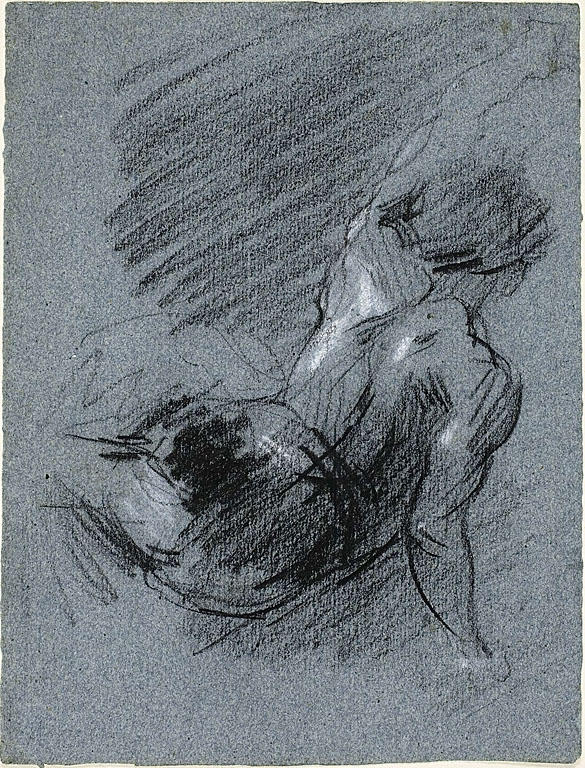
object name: Drawing and Watercolor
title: Back View of Seated Figure, Lifting Left Arm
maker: Jean Baptiste Carpeaux (French, 1827-1875); after Jean Louis André Théodore Géricault (French, 1791-1824)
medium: Black and white chalk on blue wove paper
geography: France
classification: chalk; drawings (visual works); prints and drawing